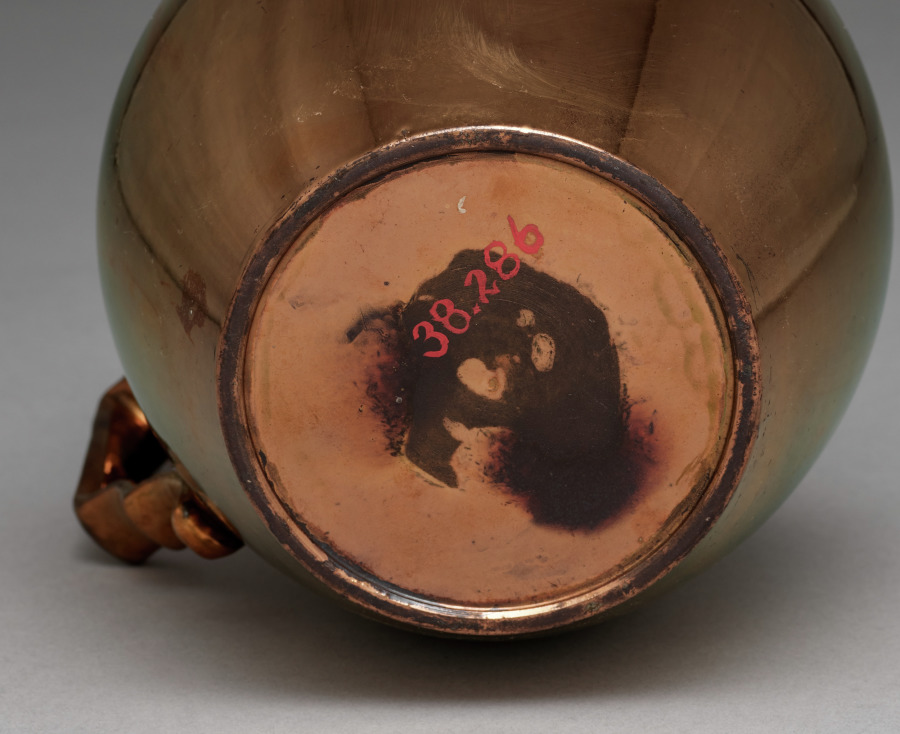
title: Copper-lustre Pitcher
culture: England, early 19th century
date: c. 1812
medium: ceramic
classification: Ceramic